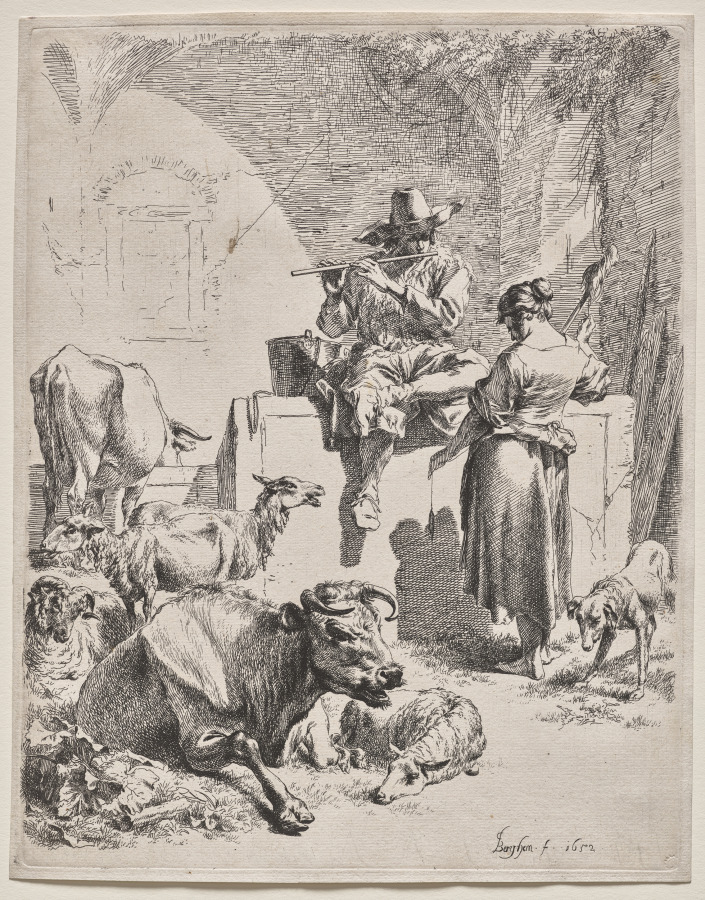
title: The Piping Shepherd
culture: Netherlands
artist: Nicolaes Berchem (Dutch, 1620–1683)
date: 1652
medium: etching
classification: Print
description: In this bucolic scene, a shepherd plays a tenor flute in hopes that his melody will seduce a shy shepherdess.